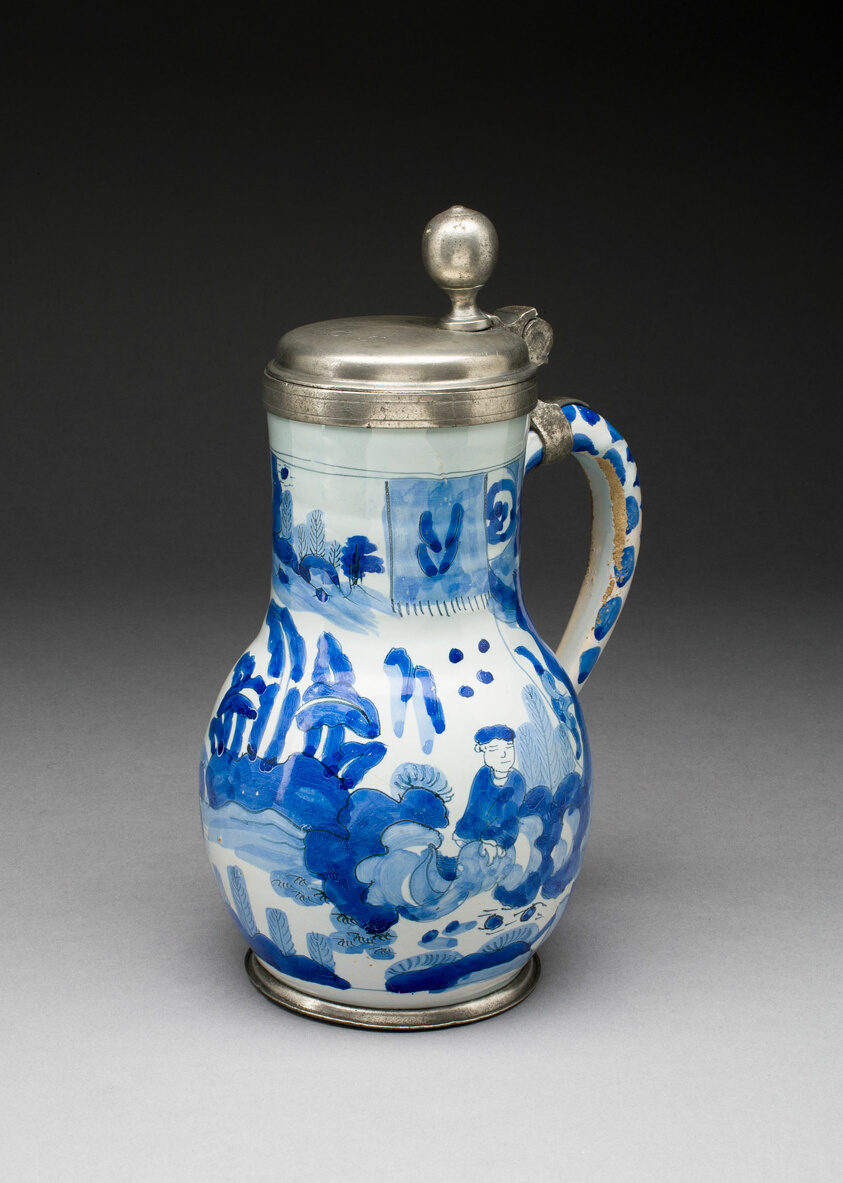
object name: Ceramics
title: Wine Jug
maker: Germany, Ansbach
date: c. 1720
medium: Tin-glazed earthenware (faience) and pewter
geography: Ansbach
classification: earthenware; european decorative arts; ceramics